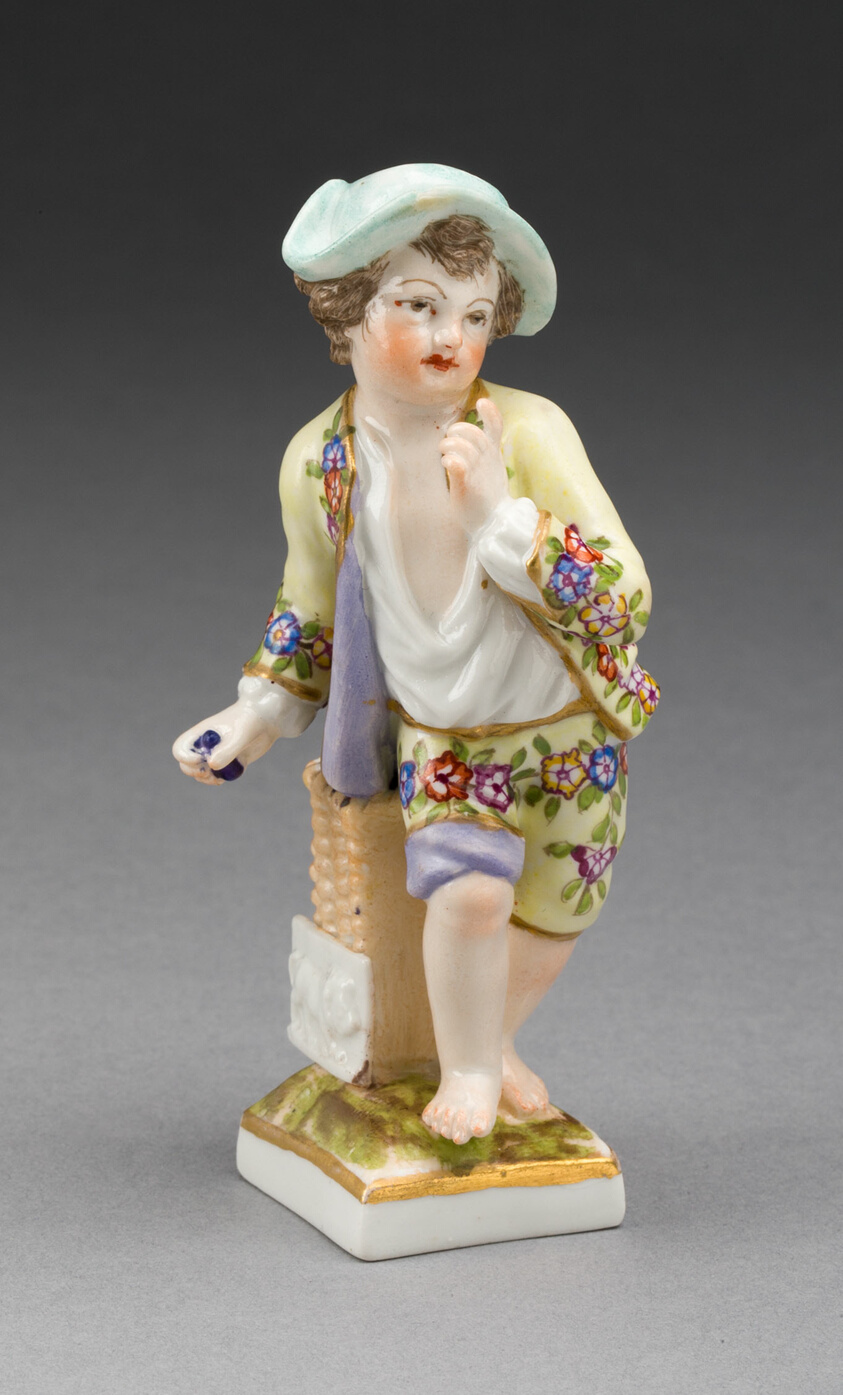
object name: Ceramics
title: July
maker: Germany, Berlin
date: c. 1770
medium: Hard-paste porcelain, polychrome enamels, and gilding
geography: Berlin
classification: sculpture; ceramics; porcelain; european decorative arts